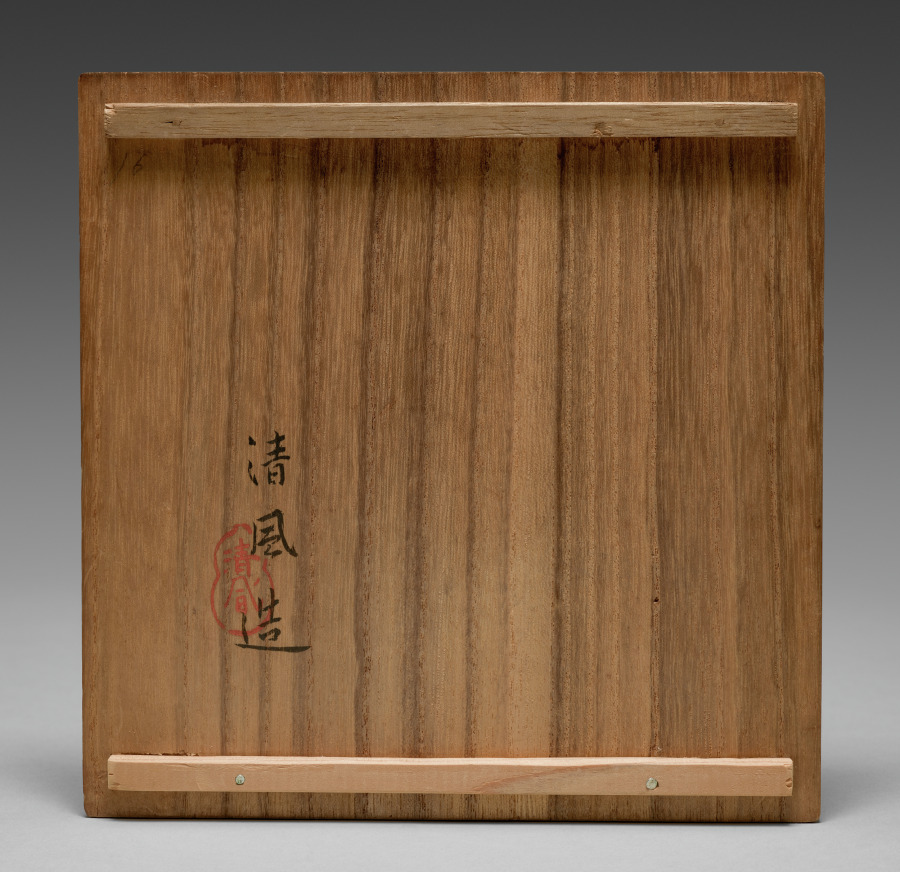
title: Sweets Bowl with Chrysanthemums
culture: Japan, Taishō period (1912–26) or Shōwa period (1926–89)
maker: Seifū Yohei IV (Japanese, 1872–1951)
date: 1914–46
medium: Porcelain with molded and carved design, underglaze color, and cream glaze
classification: Ceramic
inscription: 清風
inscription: 成山清風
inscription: 清風造 【印】 清風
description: Sweets bowls hold the confections enjoyed when drinking tea. This bowl and CMA 2022.206 offer an important lesson in appreciating Yohei IV’s ceramic practice. While they have the same design and shape and are made with the same materials, the execution of the pieces makes them entirely different after close inspection, thereby demonstrating the range of possible production results from a single template. Each bowl has the same composition of two different types of chrysanthemum flowers, one with long, slim, knifelike petals and the other with short, rounded, multilayered petals, shown running around its surface in low relief. The centers of the flowers are painted with yellow under the glaze. Yohei III formulated a number of new underglaze colors during his career, and this is likely one of them. For both bowls here, Yohei IV used his father’s kanpakuji formula, with underglaze pink for the gradated wash of color surrounding the flowers. The storage box lid provides abbreviated descriptions of the complex processes used in the surface decorations. It identifies the bowl as “Sweets dish with carved picture of chrysanthemum in kanpakuji.” The box has Yohei IV’s signature on the lid’s exterior, along with a seal reading “Seizan Seifu” 成山清風. The ink inscriptions are done in an elegant semiformal calligraphy. This bowl is more subtle and smooth in both the effect of the glaze and the execution of the relief. The designs are centered on the body between rim and foot. A closer look at the delineation of the flower petals reveals that the designs differ at times with respect to which petals appear in front or behind others. The centers of the bases of both bowls are incised with “Seifu” in a manner matching many other works by Yohei IV, although there are slight differences. As one might expect from the other differences in the bowls, the characters on the base of this subtle bowl are gentler, finishing in a tapering out of the strokes. Those on the bold bowl, CMA 2022.206, end in triangular pinheads.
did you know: This ivory and pink bowl by Seifū Yohei IV show his father’s “bright-jewel white porcelain” technique.